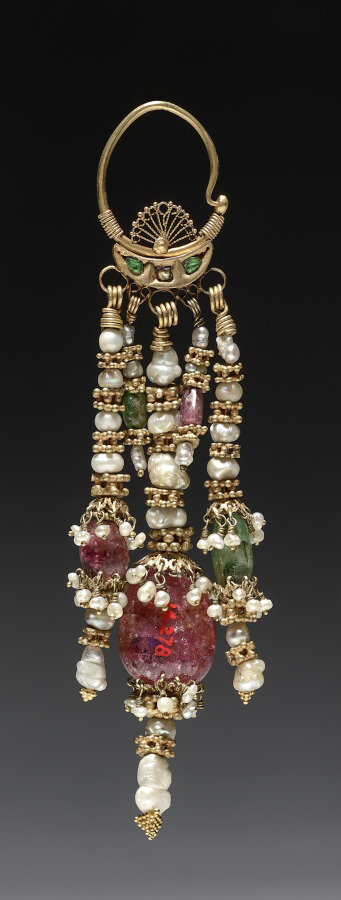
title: Earring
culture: Uzbekistan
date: 1700s–1800s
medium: silver gilt with pearls, gold beads and crystal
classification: Jewelry